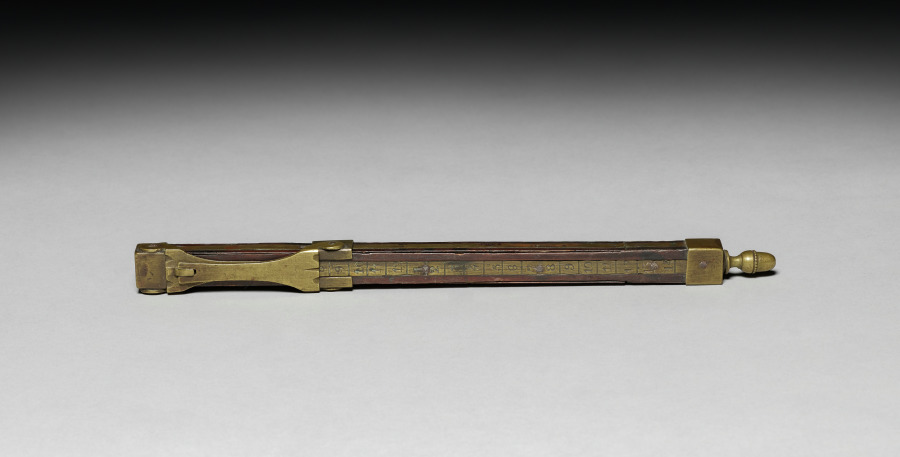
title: Slide Scale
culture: Europe, 18th century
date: 1700s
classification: Tool